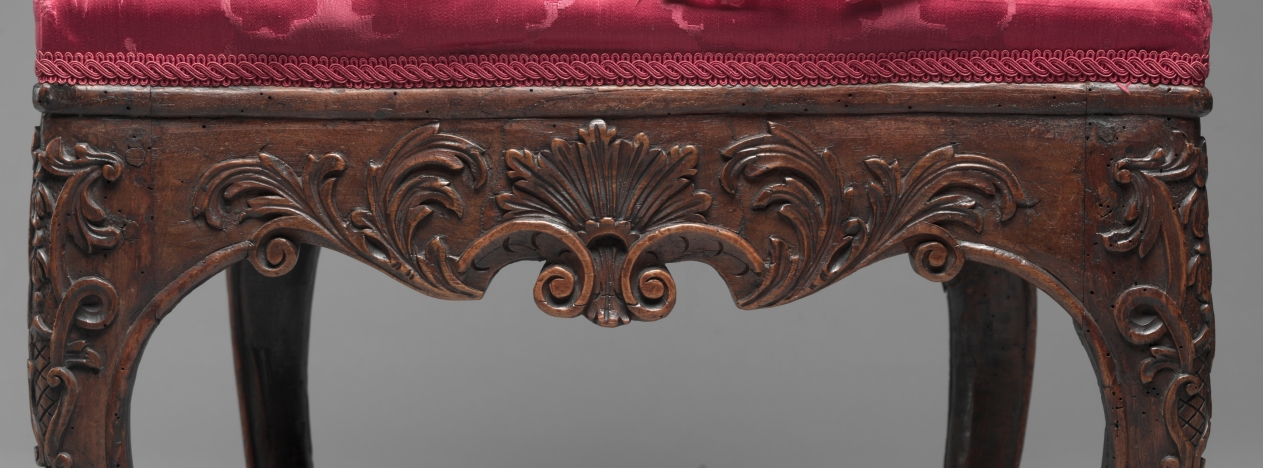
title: Side Chair (2 of 2)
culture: Germany, Belgium, or the Netherlands, early 18th century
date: early 1700s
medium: walnut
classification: Furniture and woodwork